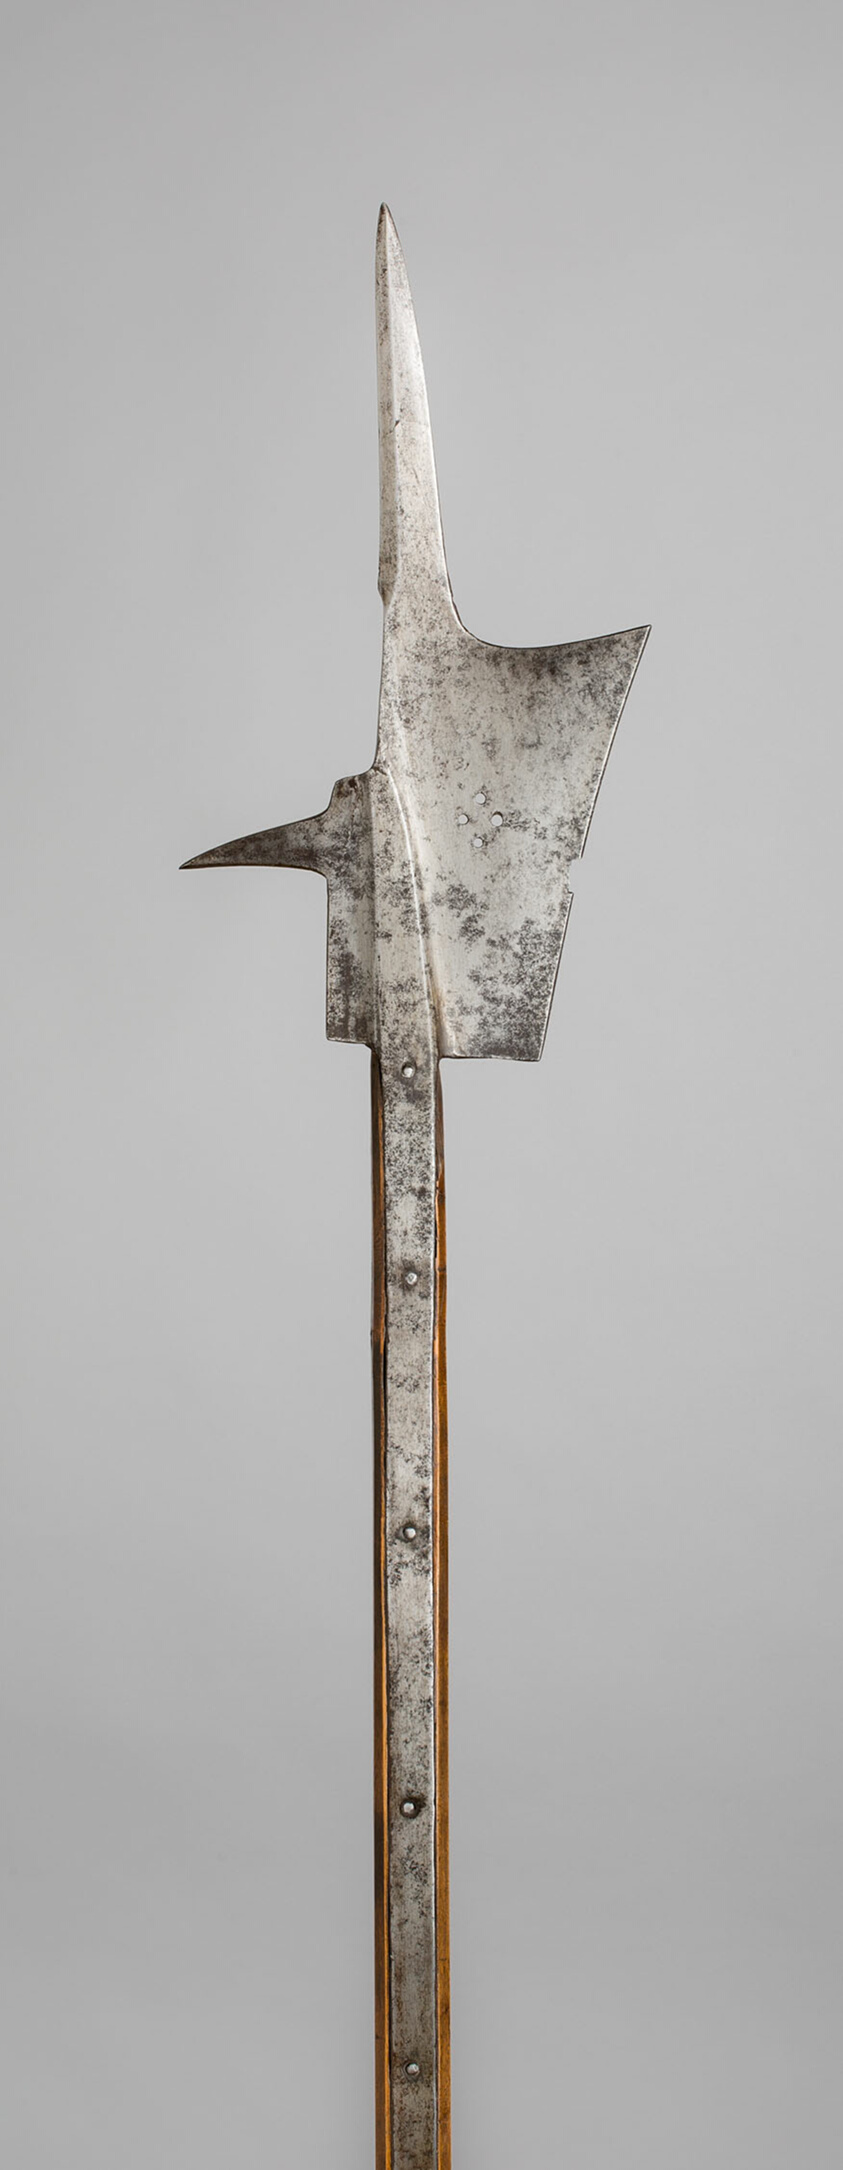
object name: Arms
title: Halberd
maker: German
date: c. 1500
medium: Steel and wood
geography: Germany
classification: edged weapon-staff; arms; arms and armor